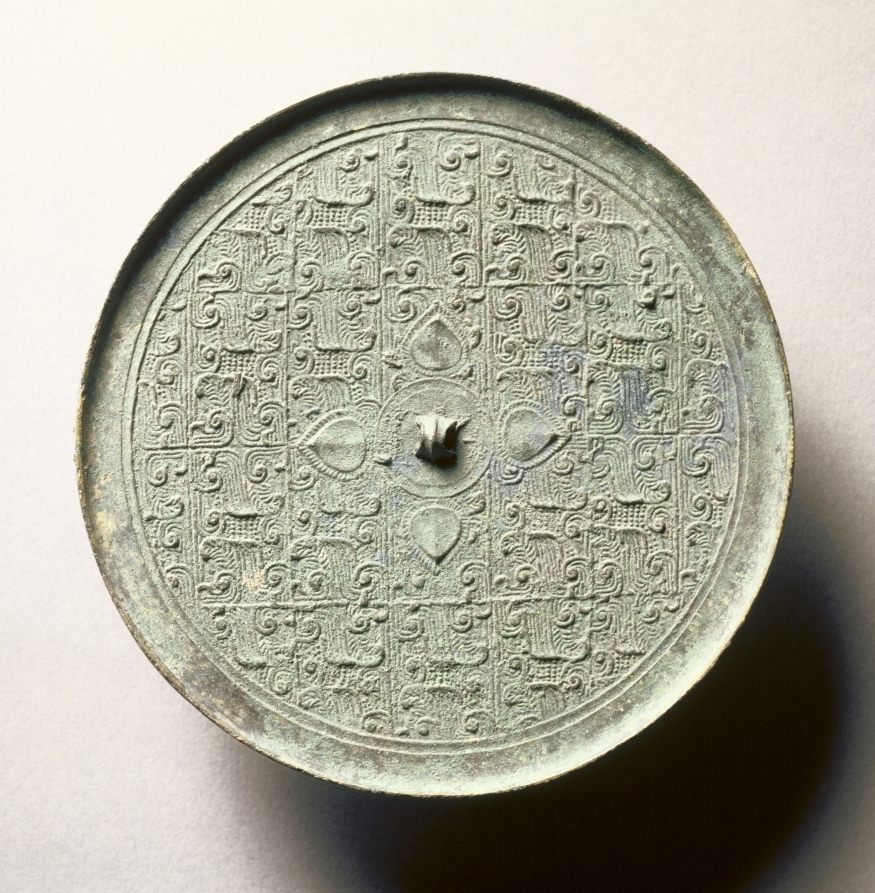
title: Mirror with Quatrefoil and Feather Pattern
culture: China, Eastern Zhou dynasty (770–256 BCE), Warring States period (475–221 BCE)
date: 300s BCE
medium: bronze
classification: Metalwork